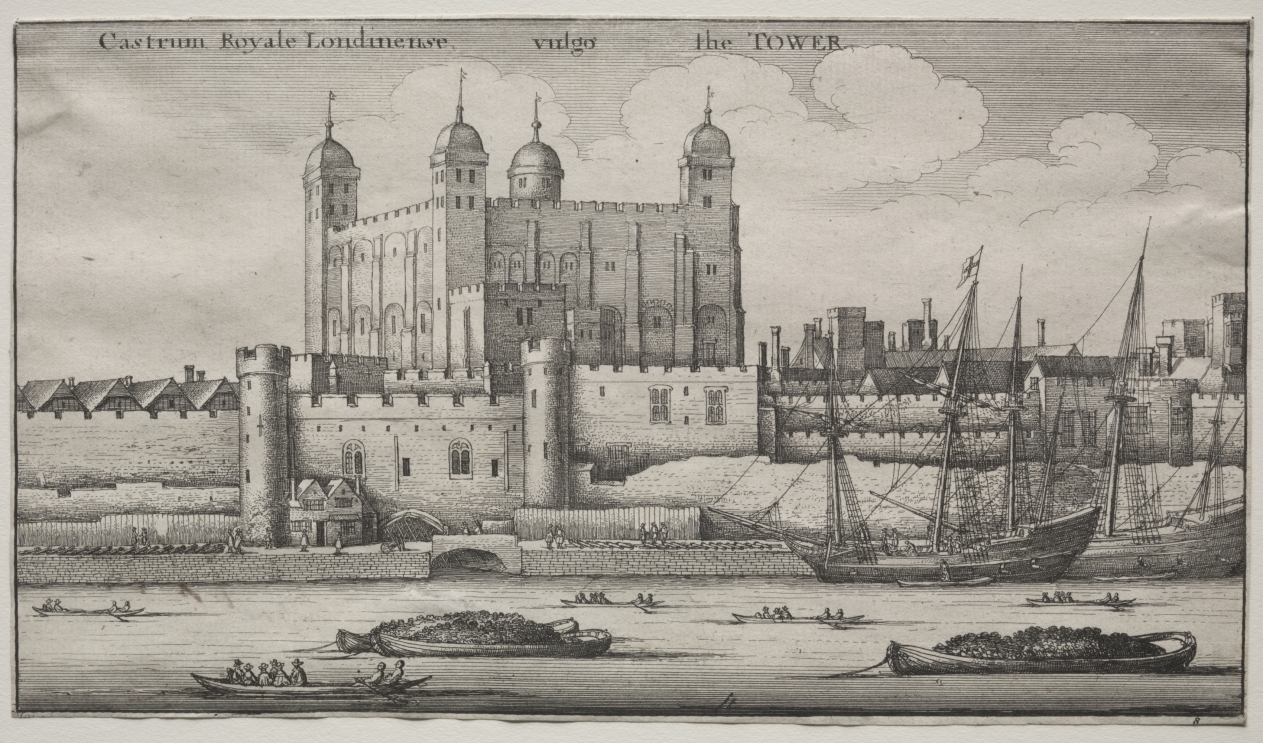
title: The Tower, London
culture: Bohemia, 17th century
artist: Wenceslaus Hollar (Bohemian, 1607–1677)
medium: etching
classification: Print